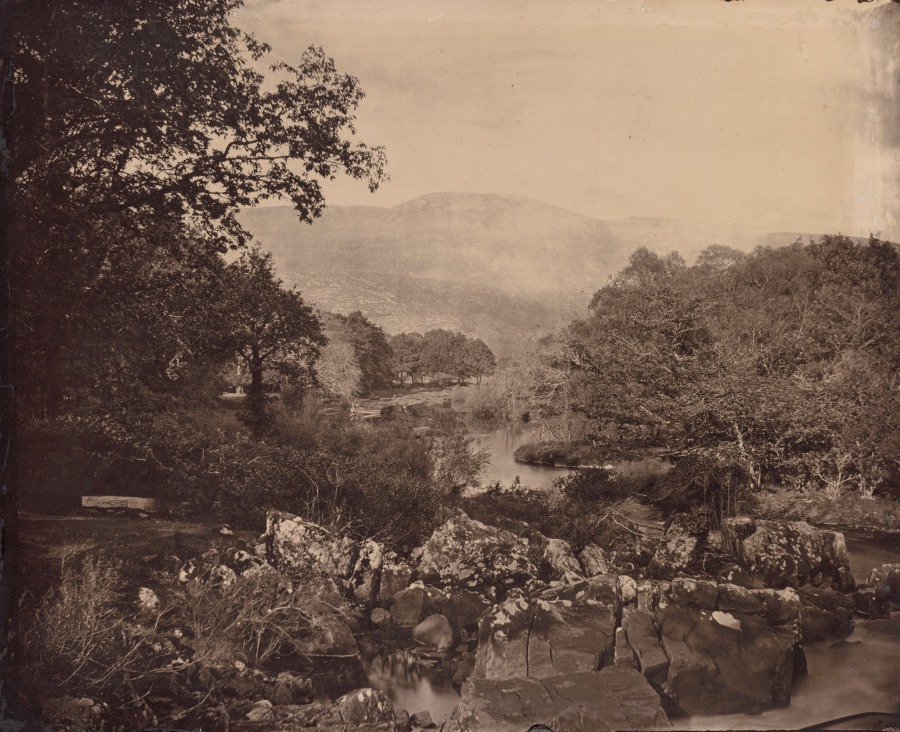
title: View from the Lawn, Dennicanniby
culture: England, 19th century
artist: Vernon Heath (British, 1819–1895)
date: 1870s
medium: carbon print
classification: Photograph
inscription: written in pencil on verso: "EC No7"; "Wilson"; in ink on verso: "View from Lawn. Dennicanniby. Killarney-S-"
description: A distinguished photographer who received royal patronage, Vernon Heath traveled extensively throughout the British Isles documenting estates and landscapes on commission. This carefully composed scenic view, taken just above the Upper Lake of Three Lakes of Killarney in southwest Ireland, exemplifies the pioneering technique he developed in the early 1860s for enlarging 12x10-inch glass negatives. Made when contact printing was the norm, Heath’s carbon-printed enlargements showed no distortion and preserved the general artistic effect, which brought praise from the photographic press. Through his outstanding ability to manipulate wet collodion plates in the field, he excelled at controlling light and rendering aerial perspective. Indeed, Heath was highly acclaimed for the pictorial detail and faithful description of the picturesque scenes his Victorian audience so admired. By 1871 the carbon pigment process was his preferred method for printing. It produced a softening effect and greater gradation of tone in his photographs while rendering them impervious to fading caused by natural light.